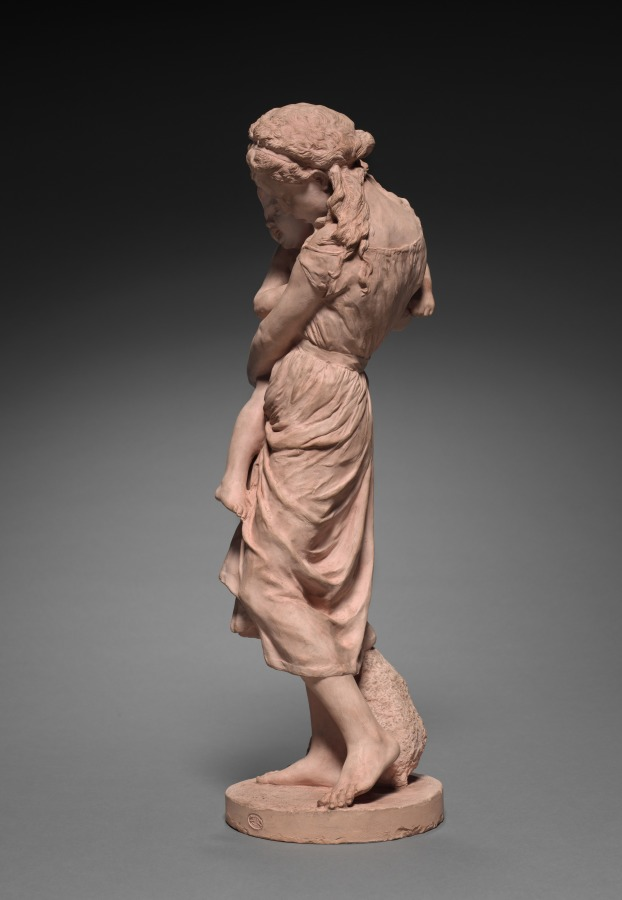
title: Brother and Sister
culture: France, 19th century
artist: Jean-Baptiste Carpeaux (French, 1827–1875)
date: 1875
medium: terracotta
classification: Sculpture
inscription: Signed "JBT" Carpeaux/1875" upper surface of base.